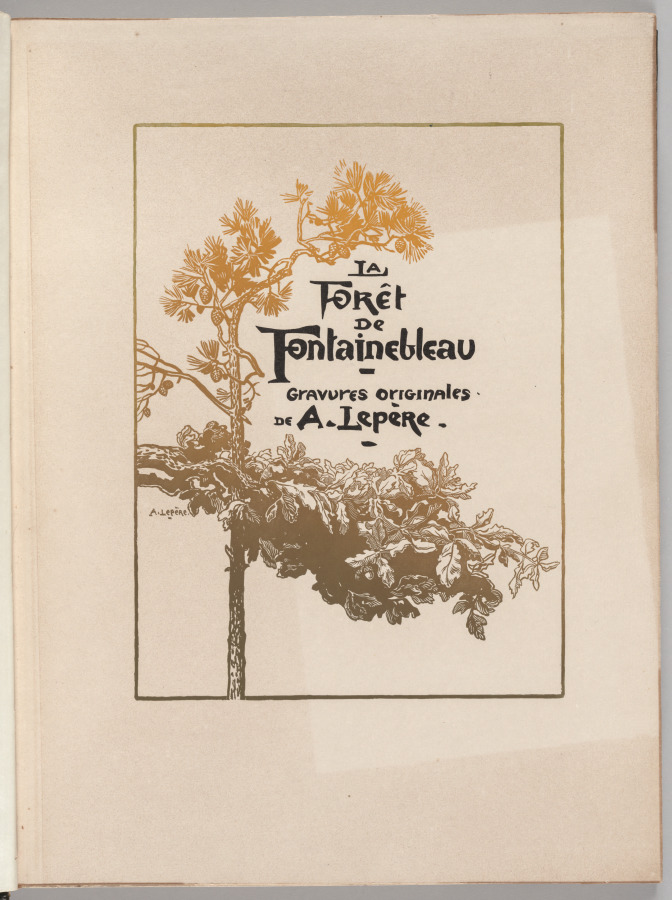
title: Fontainebleau Forest: Cover (La Forêt de Fontainebleau)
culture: France, 19th century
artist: Auguste Louis Lepère (French, 1849–1918)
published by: A. Desmoulins, Published in Revue Illustrée, 1887–90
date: 1890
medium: wood engraving from bound volume of 34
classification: Bound Volume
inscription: On block, within image, left, in green ink: A. LEPÉRE; in block, within image, in black ink: LA FORÊT DE FONTAINEBLEAU / GRAVURES ORIGINALS DE A. LEPÈRE